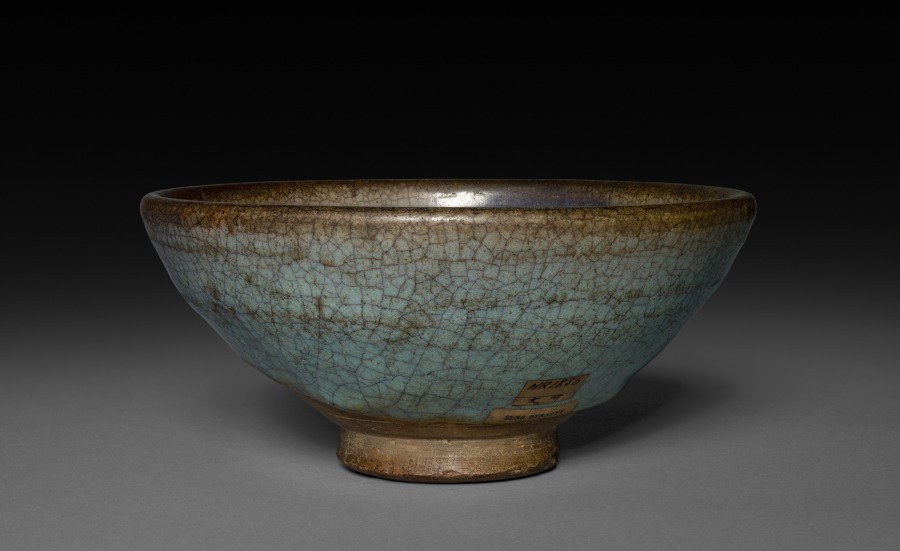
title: Bowl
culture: China, Yuan dynasty (1271-1368)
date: 1271–1368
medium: earthenware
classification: Ceramic